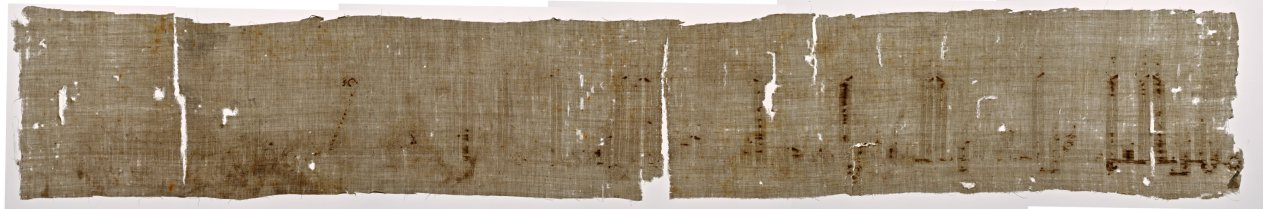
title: Tiraz of Caliph ‘Abd al-Rahman III, from the reliquary of Santa Librada, Cathedral of Seqüenza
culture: Spain, Cordoba, Spanish Umayyad period (756–1031)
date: 941–42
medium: Linen; silk: embroidery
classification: Embroidery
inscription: only the traces of a very large-scale elaborately foliated Kufic inscription preserved, largely in the form of needle holes but with a few small areas where the stitches are intact. This is approximately the second half of the original full inscription, which measured well over two meters long; the bulk of the original textile with the first half of the inscription was formerly preserved in the Cathedral of Siquenza. As preserved on the two fragments, the full inscription reads: "[Commander of the Be]lievers al-Masir li-Din al-Muslimin, may God support him! That which was made through the agency of Durri, his servant, in the year thirty and three hundred."